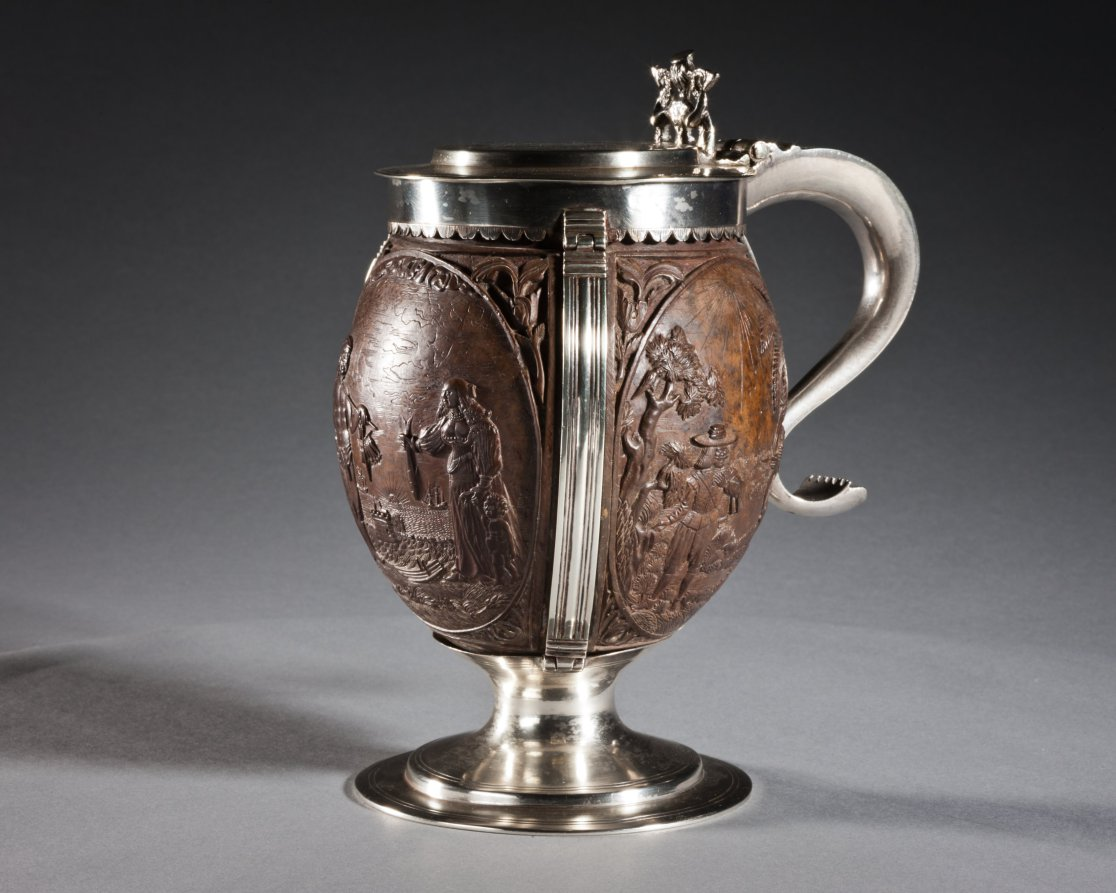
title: Coconut Cup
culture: carved coconut, probably The Netherlands; silver mount, probably England, 17th century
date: c. 1630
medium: carved coconut in silver mount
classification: Metalwork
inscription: top lid has engraved coat-of-arms, underside of lid has inscription: George Lewis TIVERTON Feby, 1st 1760.